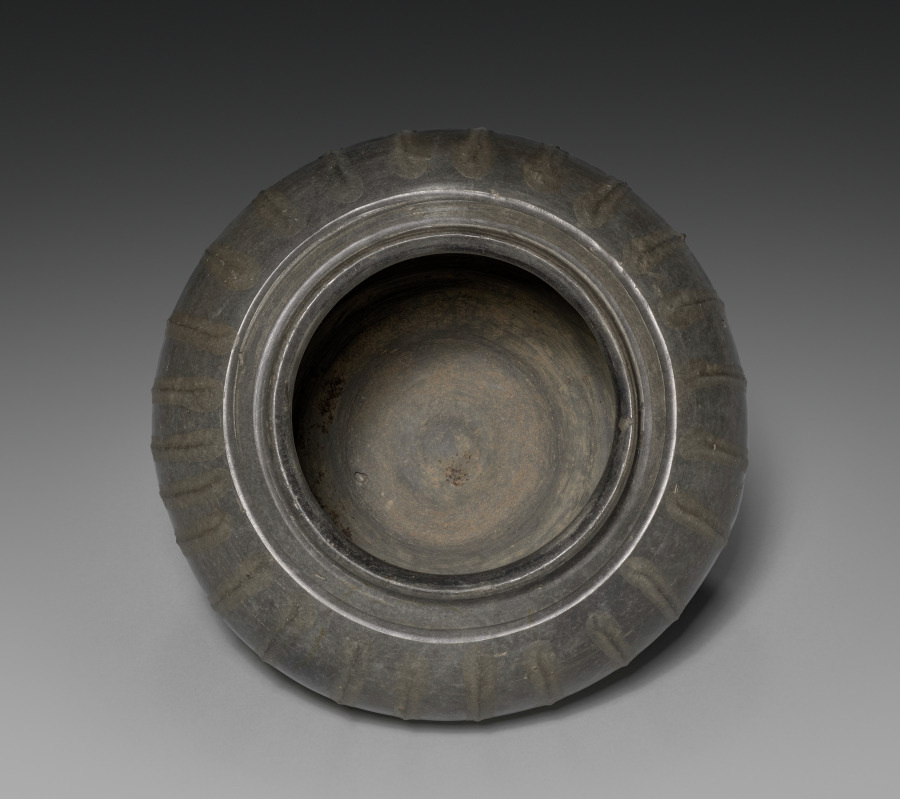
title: Pot with Cover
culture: Rhenish (Cologne), Gallo-Roman, 2nd century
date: 100s CE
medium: tan ware with gray and some brown burnished slip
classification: Ceramic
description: The work of Roman potters is very different from that of their Greek predecessors. Greek clay had allowed potters to throw thin-walled ceramics. Slips (paint) made from this clay had permitted painters to draw complicated scenes and figures with infinite care. As the Roman empire grew to include Germany and Britain, local clays found there were better for producing heavier pottery with three-dimensional decoration like the vases shown here. These jars--decorated with a human face (1992.125), animals (1992.126), a feather pattern (1992.183), a wheat pattern (1992.124), and vertical ribs (1992.127,a) were probably filled with foods or liquids and given either as gifts to an elaborate burial or as offerings to a god's shrine.